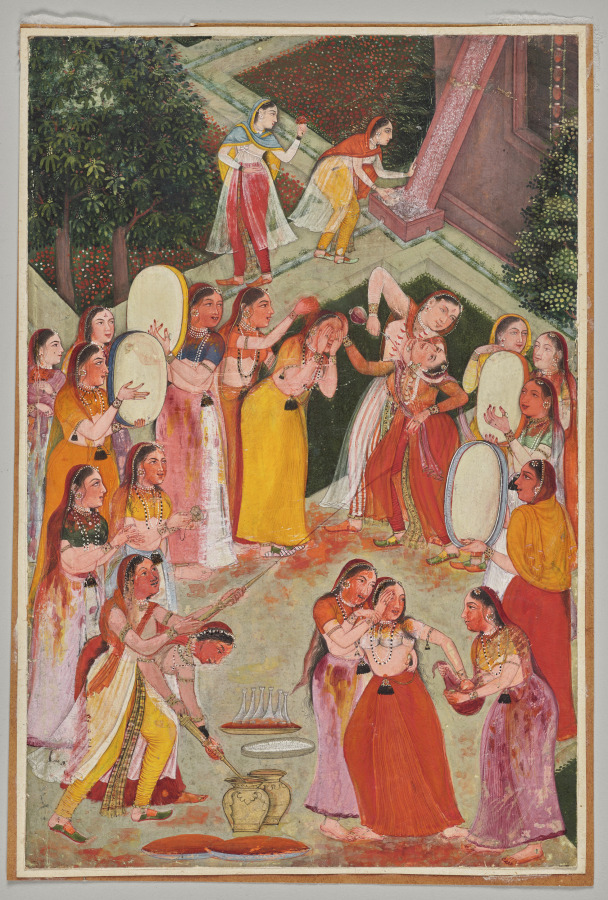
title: Girls Spraying Each Other at Holi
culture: Northwestern India, Rajasthan, Rajput Kingdom of Bikaner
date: c. 1640–50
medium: Gum tempera, ink, and gold on paper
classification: Painting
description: The antics of Holi, the festival of spring, are in full tilt in this scene that takes place in the women's quarters of a palace. Most of the women have already been stained with the red and yellow colors that they squirt and smear on one another to the beat of handheld drums and a lively song. In a composition repeated from an imperial Mughal scene, one woman aggressively and playfully has another in a headlock and pours red liquid down her blouse. The princely state of Bikaner had close ties with the Mughal court, and some of its artists were familiar with Mughal painting, as is evident in the rendering of the garden and the figures.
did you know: The sandstone cascade at the top of the page propels water through the garden channels.